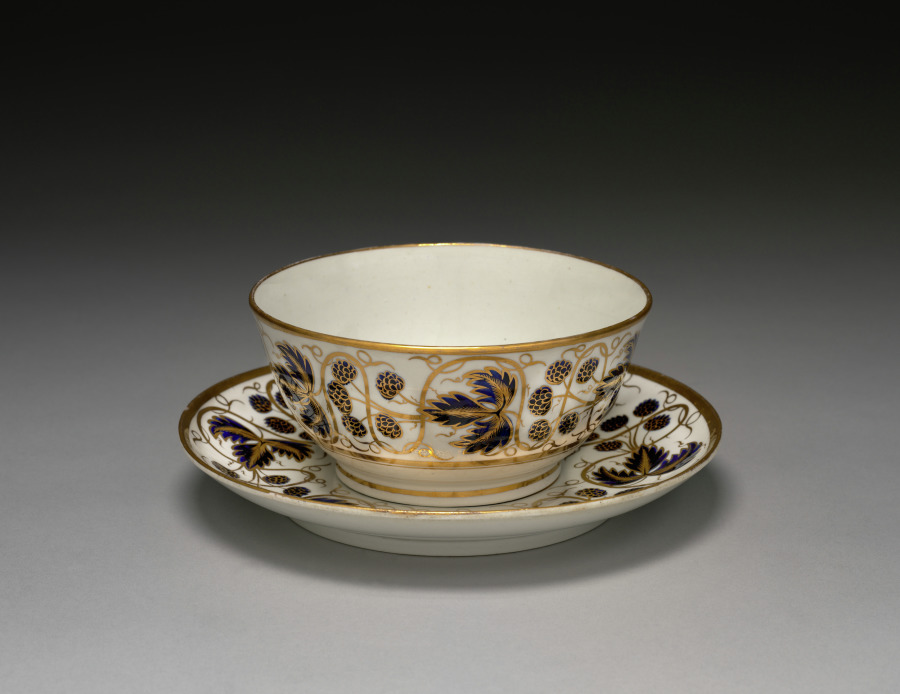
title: Saucer and Bowl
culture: England, late 18th century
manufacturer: Worcester Porcelain Factory (British, established 1751)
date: late 1700s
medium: porcelain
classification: Ceramic